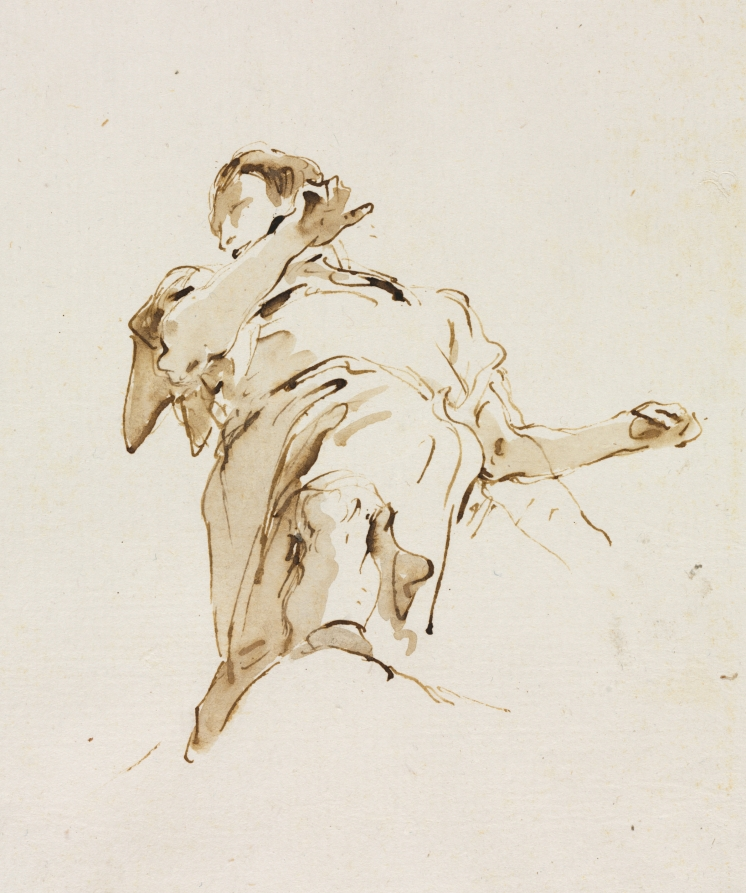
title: Male(?) Figure Seen from Below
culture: Italy, 18th century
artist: Giovanni Battista Tiepolo (Italian, 1696–1770)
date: c. 1740s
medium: pen and brown ink and brush and brown wash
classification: Drawing